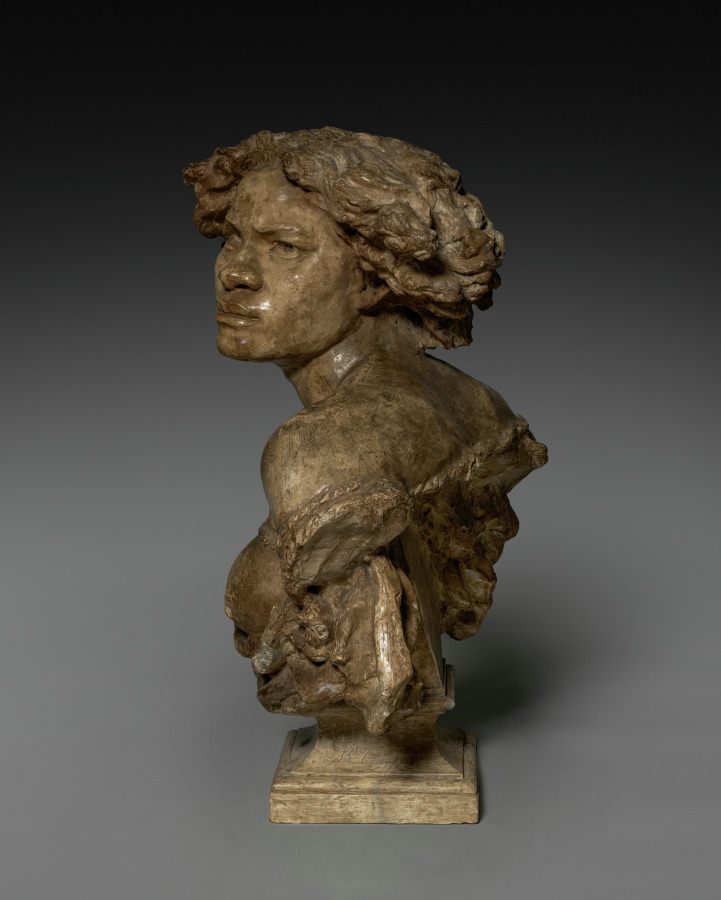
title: Why Born Enslaved!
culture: France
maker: Jean-Baptiste Carpeaux (French, 1827–1875)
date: 1867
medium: Plaster, original polychromed surface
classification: Sculpture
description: One of the most powerful expressions of abolitionist sentiment in the visual arts, Why Born Enslaved! depicts an African woman bound by ropes and looking defiantly upward. The ropes press painfully into her breasts; her torn blouse alludes to the violence responsible for her condition. The original, polychromed surface is covered with complex, nuanced hatchings and subtle modeling. Evidence indicates that this masterpiece of 19th-century French sculpture served as the master model for numerous casts in other museum collections.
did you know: Although officially abolished in France since 1848, slavery remained a hotly contested issue in Carpeaux’s time as it remained legal or tolerated in various countries around the world.